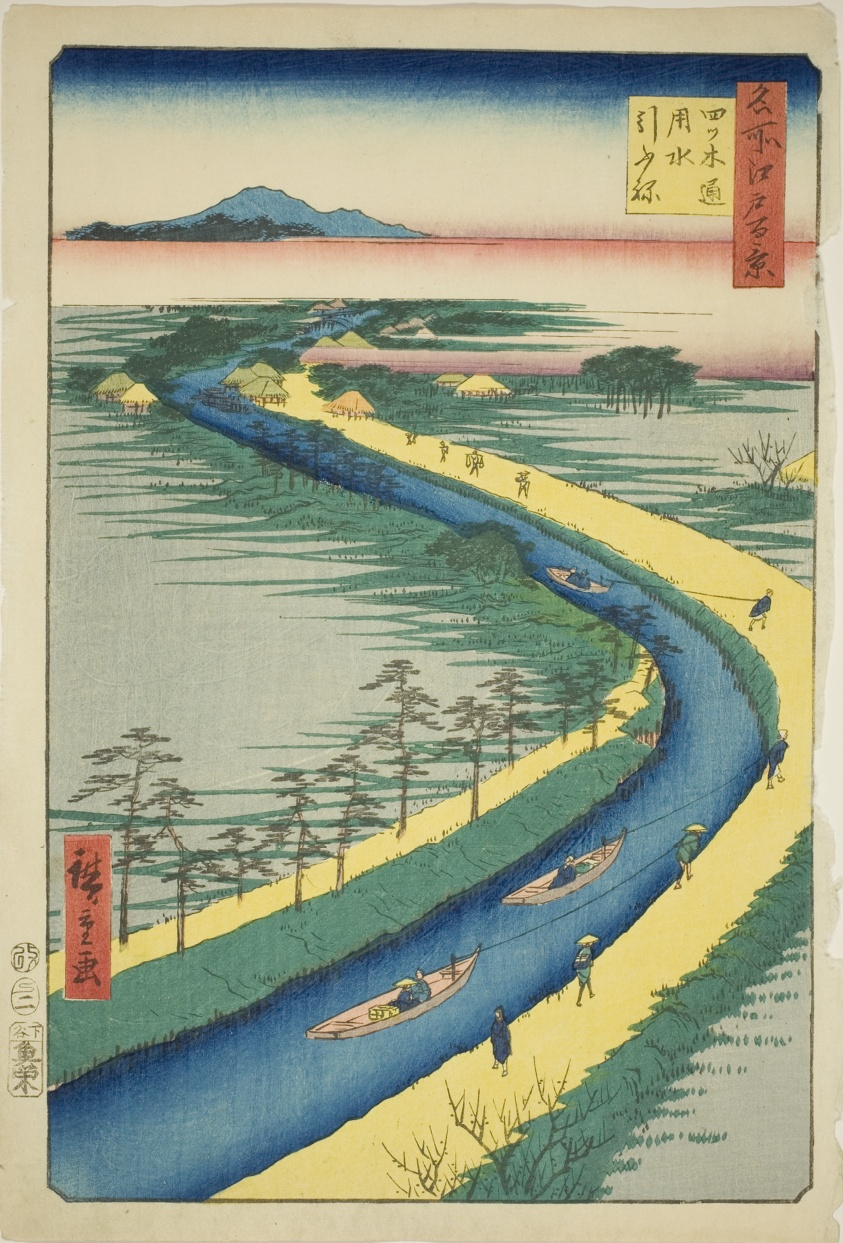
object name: Print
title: Towboats along the Yotsugidori Canal (Yotsugidori yosui hikifune), from the series “One Hundred Famous Views of Edo (Meisho Edo hyakkei)”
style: Japanese (culture or style)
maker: Utagawa Hiroshige 歌川 広重; Japanese, 1797-1858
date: 1857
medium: Color woodblock print; oban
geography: Japan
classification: woodblock print; print; asian art